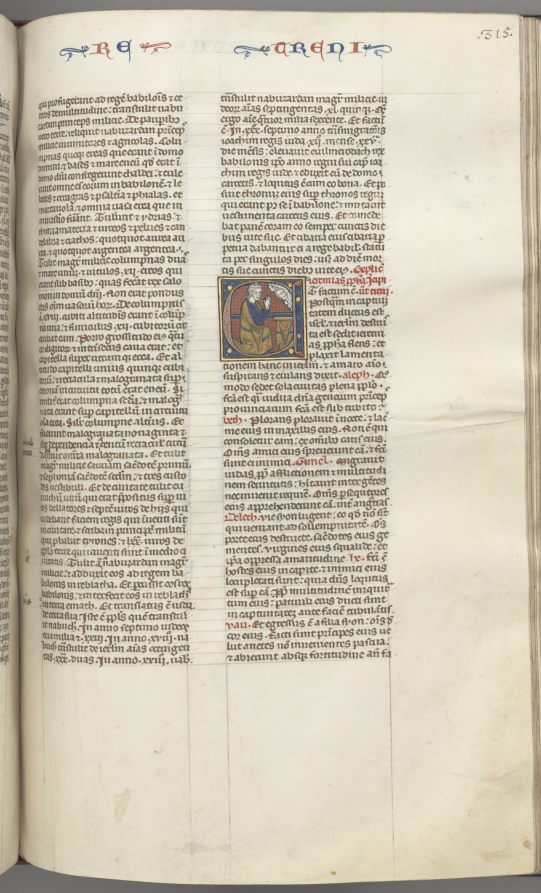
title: Fol. 315r, Lamentations, historiated initial E, a kneeling Jeremiah praying to a bust of God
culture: Southern France, Toulouse(?), 13th century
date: c. 1275–1300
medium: ink, tempera and gold on vellum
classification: Bound Volume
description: Biblical manuscripts were highly prized and important possessions of churches, monasteries, cathedral schools, and universities throughout medieval Europe. The biblical texts were known as the vulgate, the translations made by Saint Jerome in the fourth century from Hebrew and Greek into Latin, which became the definitive and official Latin version of the Roman Church. In the 13th century, the bible was, for the first time, produced as a single volume with an officially sanctioned sequence to its books and chapters as illustrated by this example. The very extensive decoration of this bible is arranged hierarchically to indicate the relative importance of the various texts so that full or almost full-page initials mark the openings of the first prologue, Genesis, and the first Gospel; historiated initials mark the beginning of each book and illuminated initials mark the Prologues.